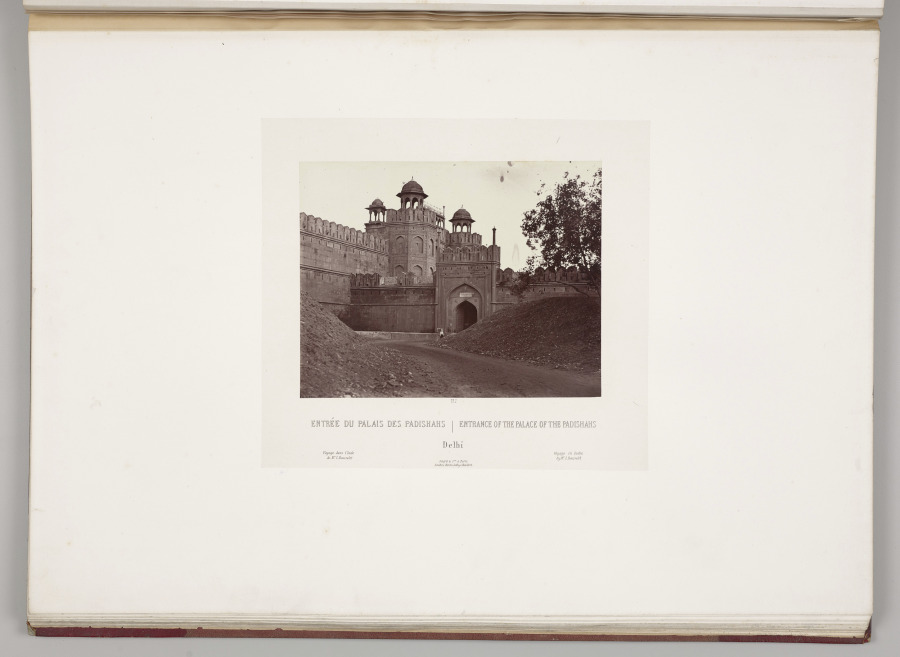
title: Entrance of the Palace of the Padishahs, Delhi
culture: France, 19th century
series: India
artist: Louis-Théophile Marie Rousselet (French, 1845–1929)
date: 1865–68, published 1869–70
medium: Albumen print from glass plate negative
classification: Photograph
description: Concerned that his drawings did not do justice to the splendor of India’s monuments, Rousselet learned photography in India that year, a remarkable accomplishment. He proved to be a talented photographer with a sophisticated sense of composition. The scenes in this volume sweep across sites of Sultanate, Rajput, and Mughal power in northern India, from the sacred Hindu city of Varanasi on the Ganges River to Alwar in Rajasthan. Also included are several scenes of industry and portraits of Indian rulers.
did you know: Louis Rousselet described himself as a “scientific traveler” when he went to India alone at age 18 in 1863 and stayed into 1868